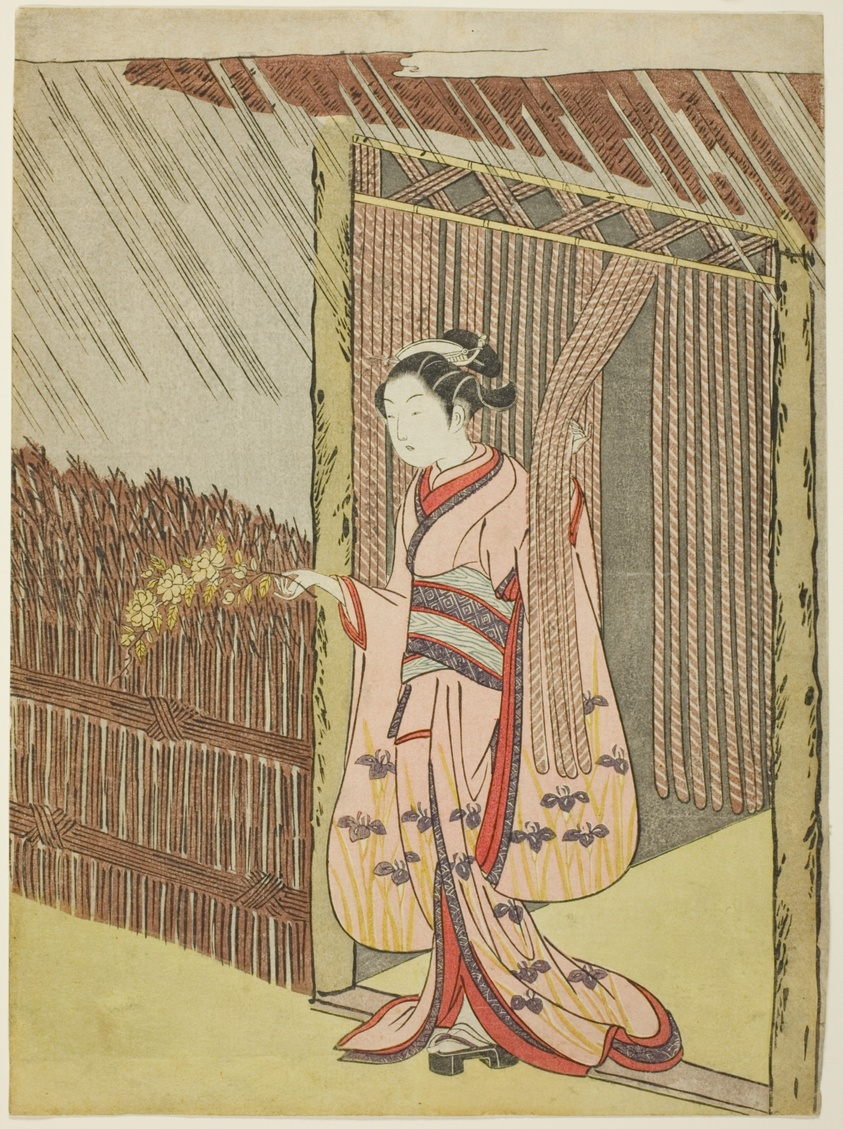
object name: Print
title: Woman Holding a Branch of Kerria Flowers in the Rain (parody of Ota Dokan)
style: Japanese (culture or style)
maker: Suzuki Harunobu 鈴木 春信; Japanese, 1725 (?)-1770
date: c. 1766/67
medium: Color woodblock print; chuban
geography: Japan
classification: woodblock print; print; asian art